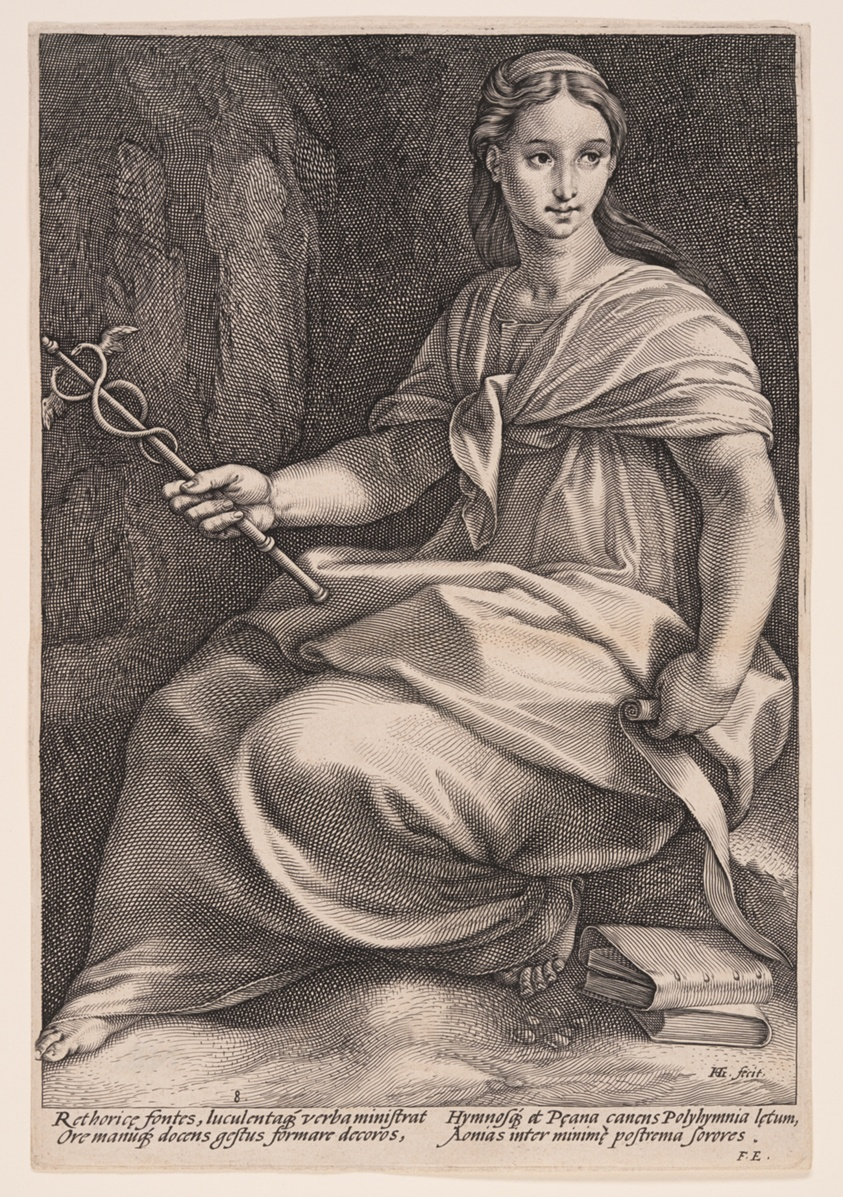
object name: Print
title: Polyhymnia, The Muse of Choral Poetry, from The Nine Muses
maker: Hendrick Goltzius (Dutch, 1558–1617)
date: 1592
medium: Engraving on laid paper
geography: Netherlands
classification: print; engraving; paper; prints and drawing